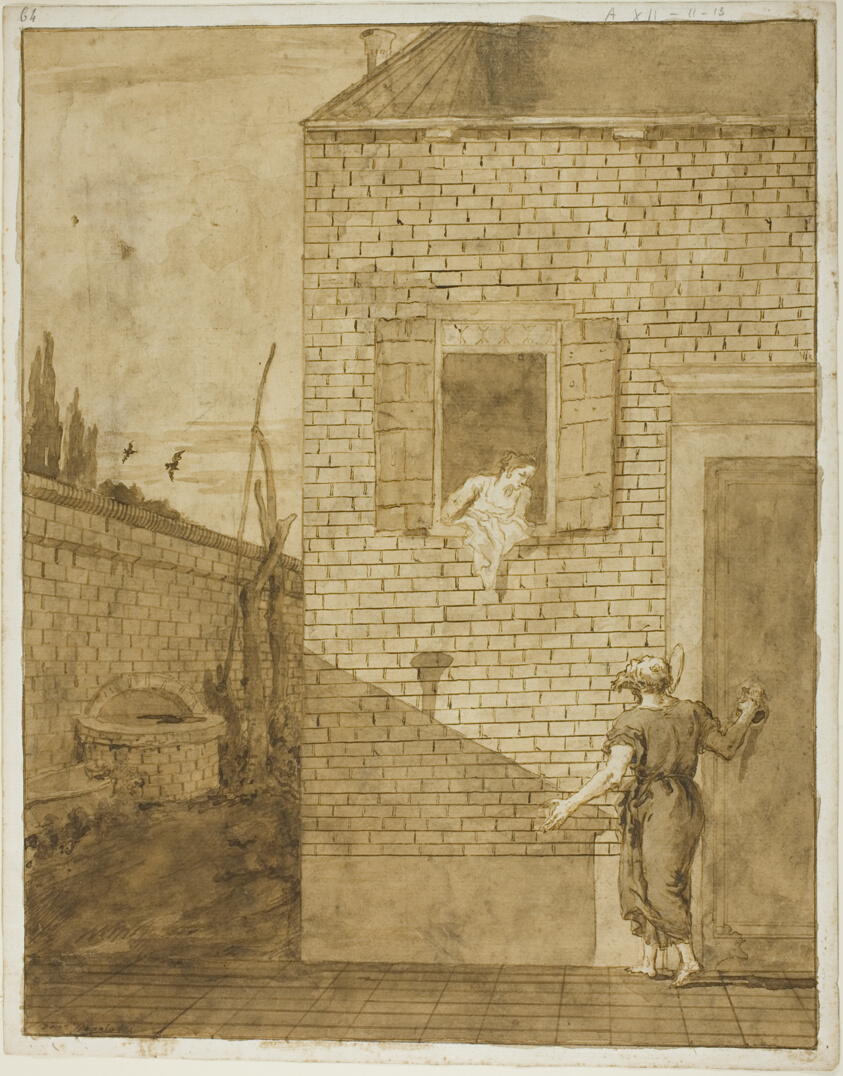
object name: Drawing and Watercolor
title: Saint Peter and Rhoda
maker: Giovanni Domenico Tiepolo (Italian, 1727-1804)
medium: Pen and brown ink, and brush and brown wash, over black chalk, on ivory laid paper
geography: Italy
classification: pen and ink drawings; drawings (visual works); prints and drawing